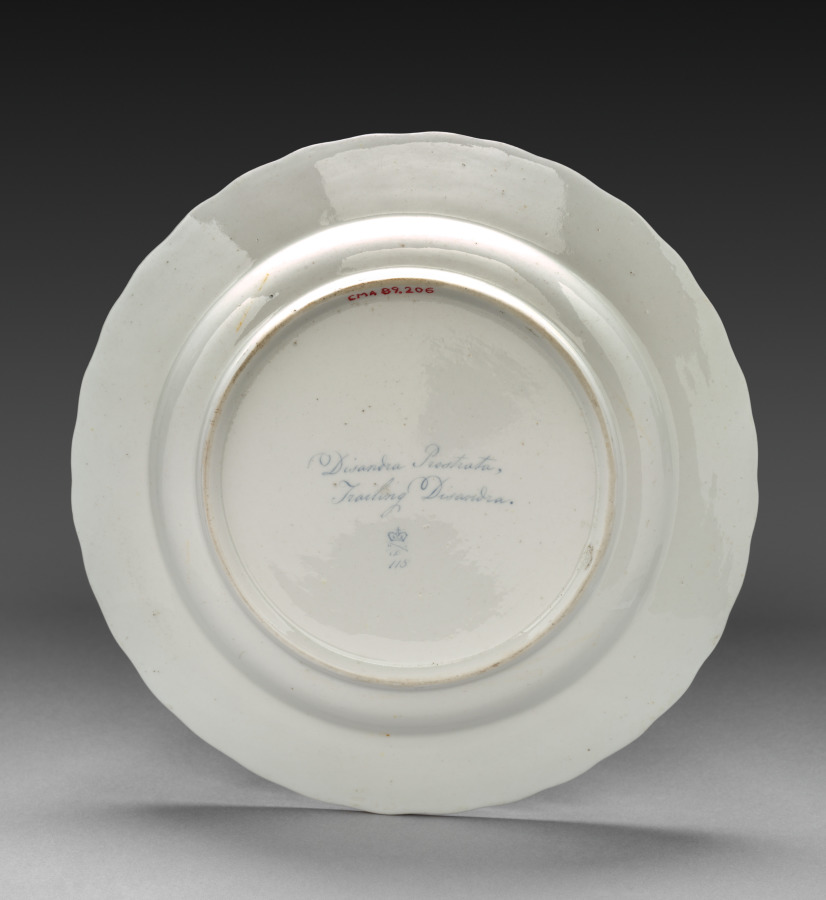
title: Plate from Dessert Service: Trailing Disandra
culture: England, Derby, 18th century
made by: Derby (Crown Derby Period) (British)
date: c. 1800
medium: porcelain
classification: Ceramic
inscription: inscribed in blue on back: Disandra Prostrata./Trailing Disandra./crown/crossed batons and dots/D/115.